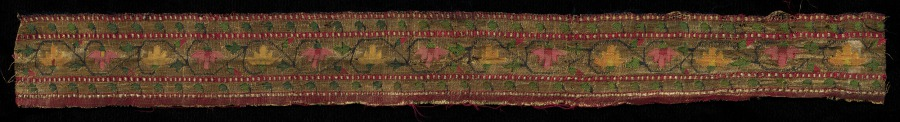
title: Strip of Border of Sari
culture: India, Aurangabad ?, 19th century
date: 1800s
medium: plain weave and tapestry weave: silk and metal thread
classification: Textile